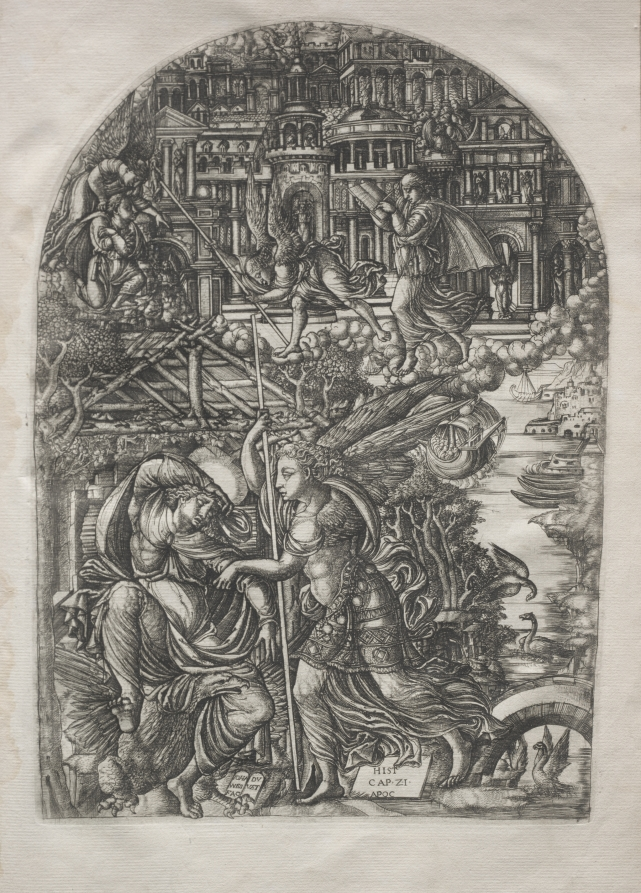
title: The Apocalypse: The Angel Shows St. John the New Jerusalem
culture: France, 16th century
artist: Jean Duvet (French, 1485–1561)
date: 1546–1556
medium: engraving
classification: Print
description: This print is part of a bound volume of works illustrating the a narrative of the Apocalypse, taken from the Revelation of Saint John in the Bible. The 23 engravings in the series occupied the artist for a number of years and represent his greatest artistic achievement. The museum's volume is one of only seven known complete sets. Jean Duvet was one of the first major printmakers in France and one of the most original artists of the 1500s. Although he worked mostly in the provincial city of Langres, he became aware of Italian art through the circulation of prints—notably those of Marcantonio Raimondi. His solidly modeled human figures reflect the influence of the Italian High Renaissance. Duvet, however, developed an idiosyncratic, highly artificial style with crowded compositions that ignore rational space in favor of ornamental surface patterns.